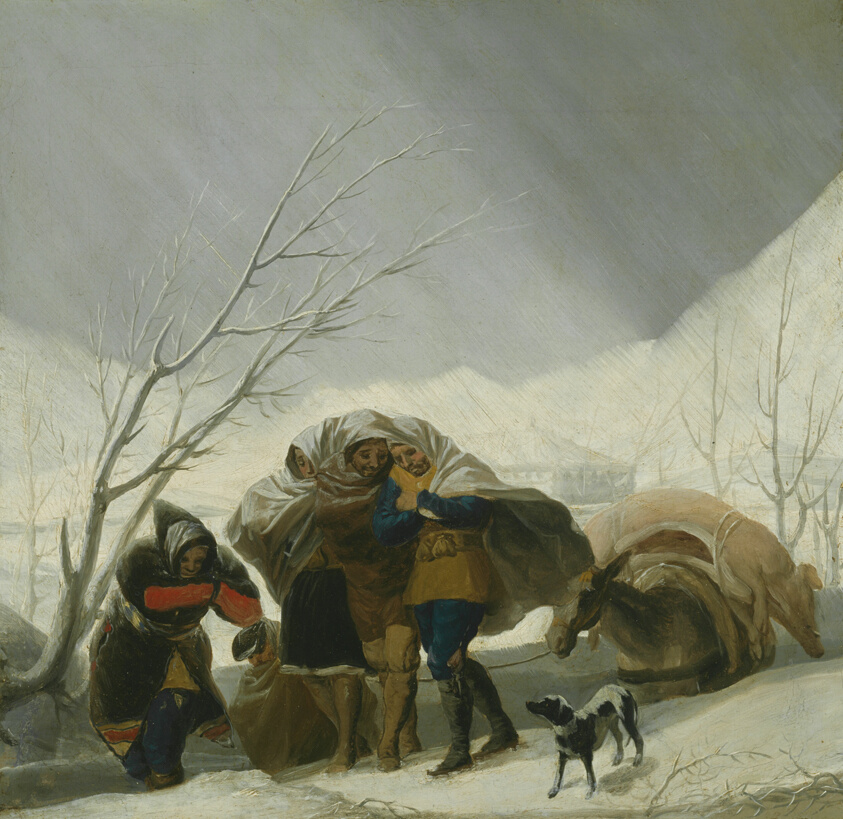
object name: Painting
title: Winter Scene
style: 18th Century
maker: Francisco José de Goya y Lucientes (Spanish, 1746–1828)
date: c. 1786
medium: Oil on canvas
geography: Spain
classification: oil on canvas; studies; oil paintings (visual works); paint; spanish; painting; european painting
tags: travel, animals, dog, figure, figures, gray (color), horse, hunter, men, people, pigs, road, snow, storms, studies, study, trees, weather/seasons, white (color), winter